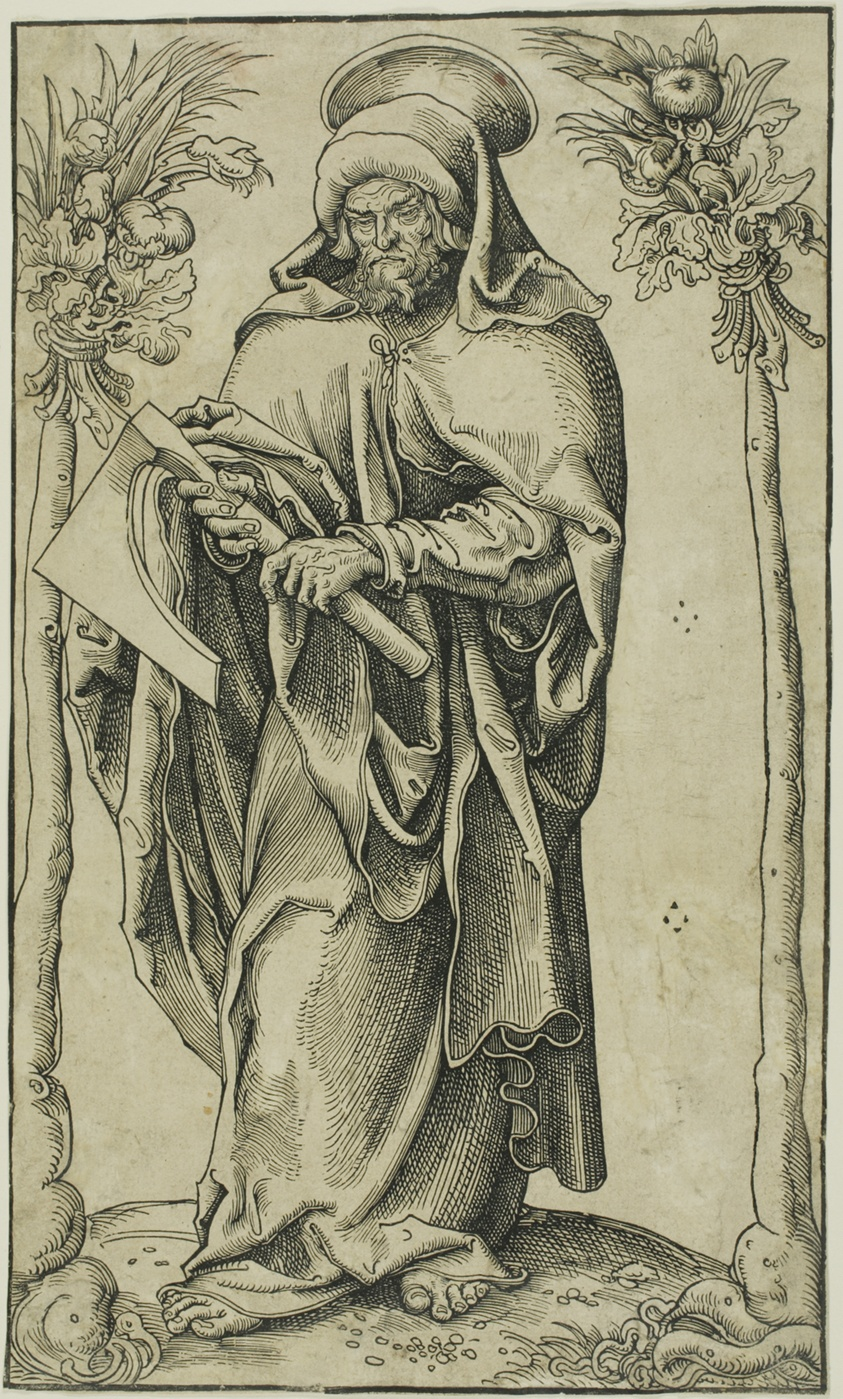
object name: Print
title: Saint Matthias, from Christ, the Apostles and Saint Paul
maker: Lucas Cranach the Elder (German, 1472-1553)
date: 1510/15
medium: Woodcut in black on buff laid paper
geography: Germany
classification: woodcut; print; prints and drawing